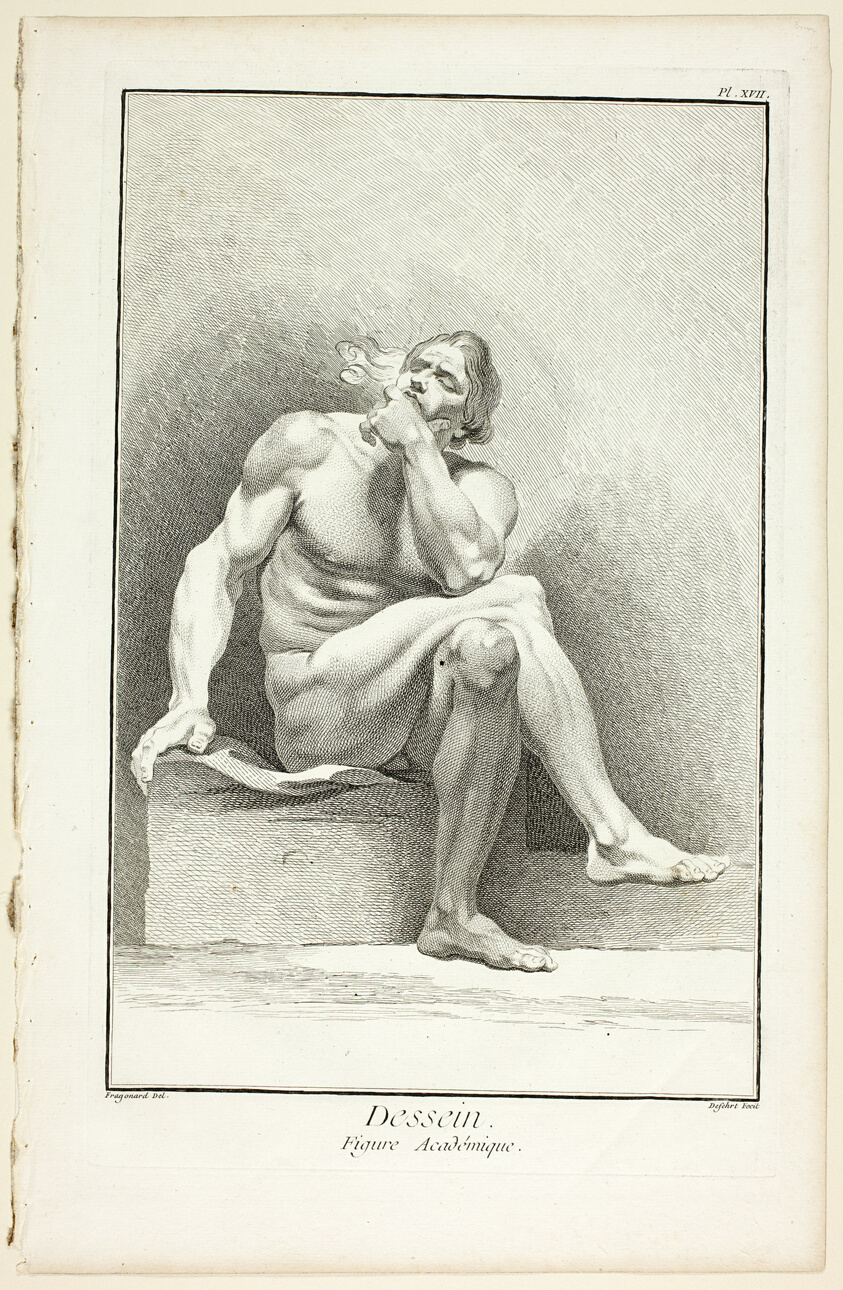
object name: Print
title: Design: Academic Figure, from Encyclopédie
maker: A. J. Defehrt (French, active 18th century); after Jean-Honoré Fragonard (French, 1732-1806); published by André le Breton (French, 1708-1779), Michel-Antoine David (French, c. 1707-1769), Laurent Durand (French, 1712-1763), and Antoine-Claude Briasson (French, 1700-1775)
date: 1762/77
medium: Etching, with engraving, on cream laid paper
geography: France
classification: etching; print; prints and drawing